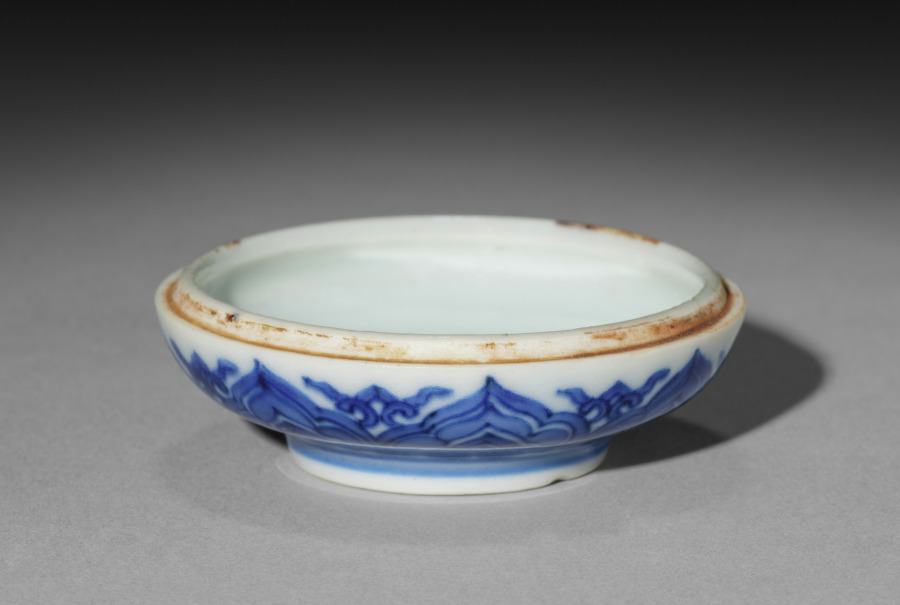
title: Round Covered Box with Medallions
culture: China, Jiangxi province, Jingdezhen kilns, Ming dynasty (1368-1644), Jiajing mark and reign (1522-66)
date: 1522–66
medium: porcelain with underglaze blue decoration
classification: Ceramic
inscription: 大明嘉靖年製